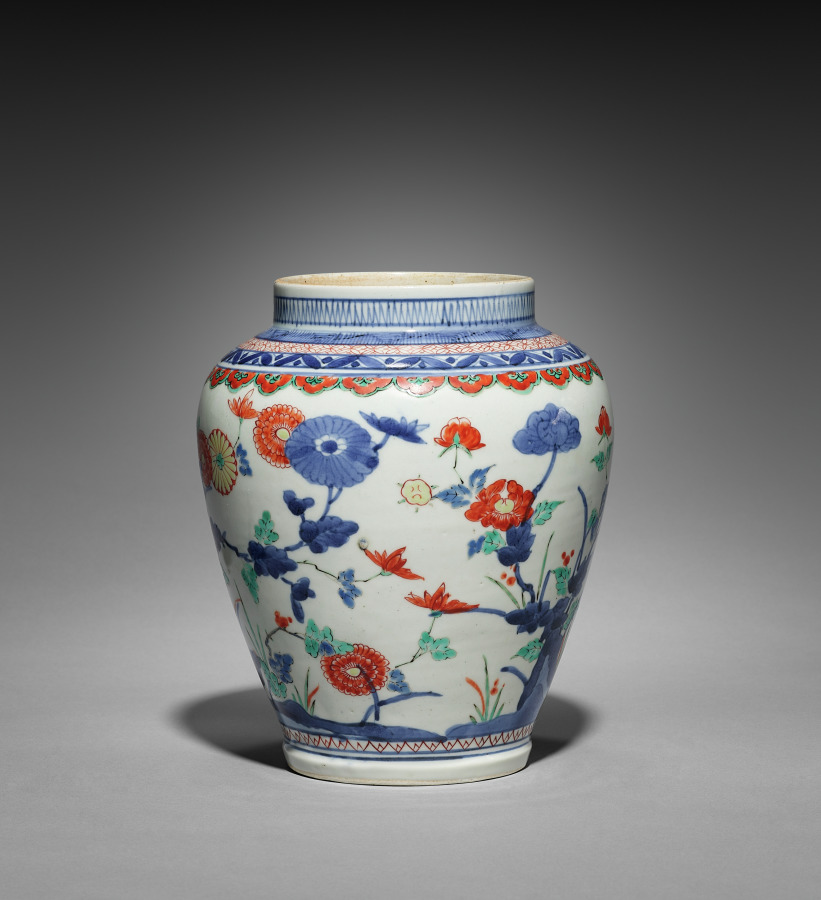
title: Covered Jar with Chrysanthemums, Peonies, and Plum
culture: Japan, Edo period (1615–1868)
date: late 1600s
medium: porcelain with underglaze blue and overglaze color enamel (Hizen ware, Kakiemon type)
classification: Ceramic